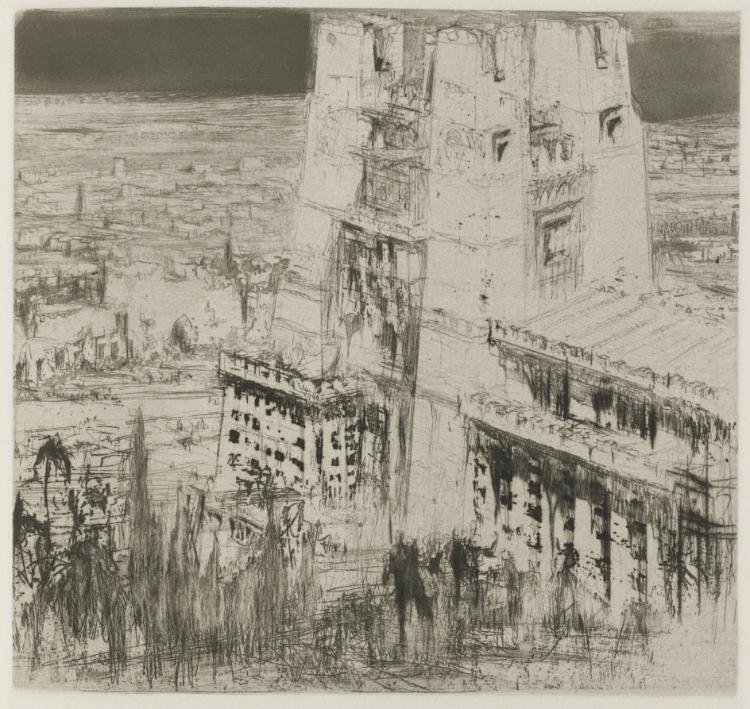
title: Herodias: Page 7, The sun made the cliffs of white marble glitter, and the golden rays on its roof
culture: England, 20th century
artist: William Walcot (British, 1874–1943)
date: 1928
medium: etching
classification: Print